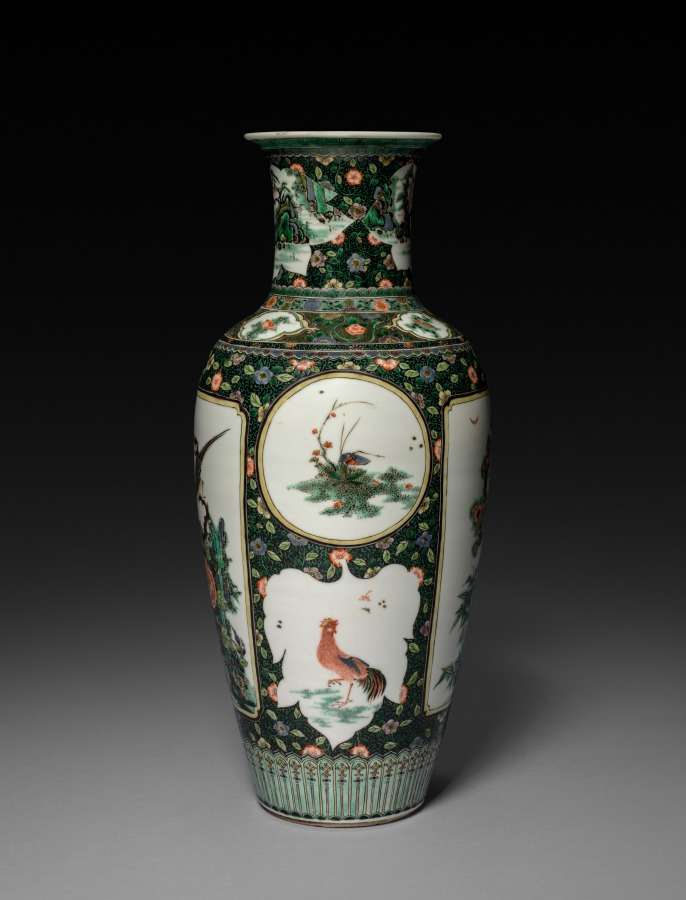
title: Baluster Vase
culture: China, Qing dynasty (1644-1911), Kangxi reign (1661-1722)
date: 1662–1722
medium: porcelain with famille verte overglaze enamel decoration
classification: Ceramic